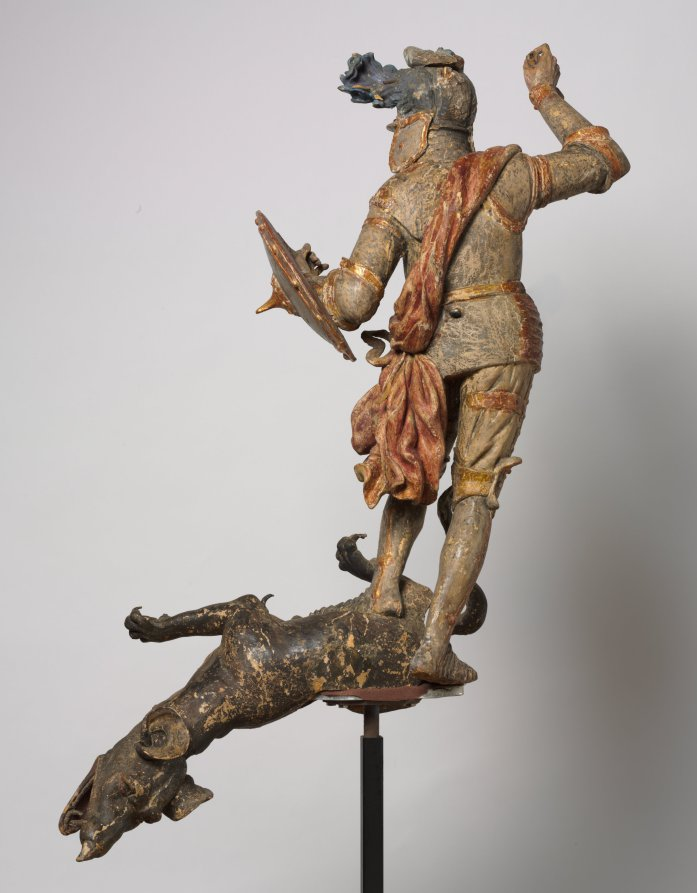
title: Saint George and the Dragon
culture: South Germany or Austria, late 17th century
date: late 1600s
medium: painted and gilded wood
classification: Sculpture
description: Saint George, a Roman soldier martyred for his Christian faith, is best known for slaying a fearsome dragon that terrorized the city of Silene, in Libya. George offered to kill the monster if residents of the city convert to Christianity. Here, George stands triumphantly over the dragon, writhing as it dies. The artist deliberately incorporated features intended to make his figure seem more familiar: the dragon seems more canine than reptilian, while George wears armor from the recent past and bears almost portrait-like facial features.